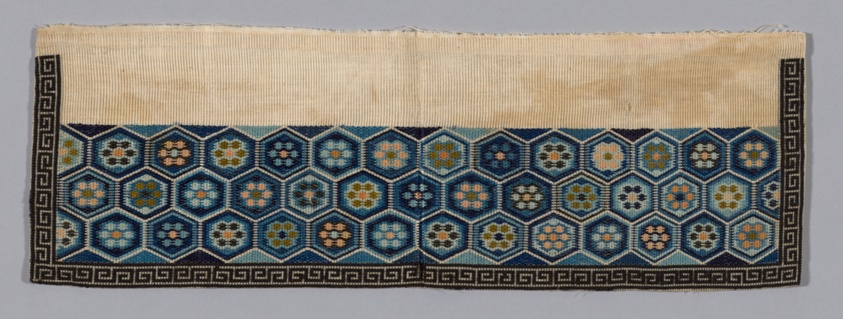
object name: Costume and Accessories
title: Woman's Trouser Band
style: qing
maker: Han-Chinese (China)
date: Qing dynasty (1644–1911), 1875/1900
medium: Floral design, black and white border embroidered on gauze.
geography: China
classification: textile; weaving; needlework (visual works); costume